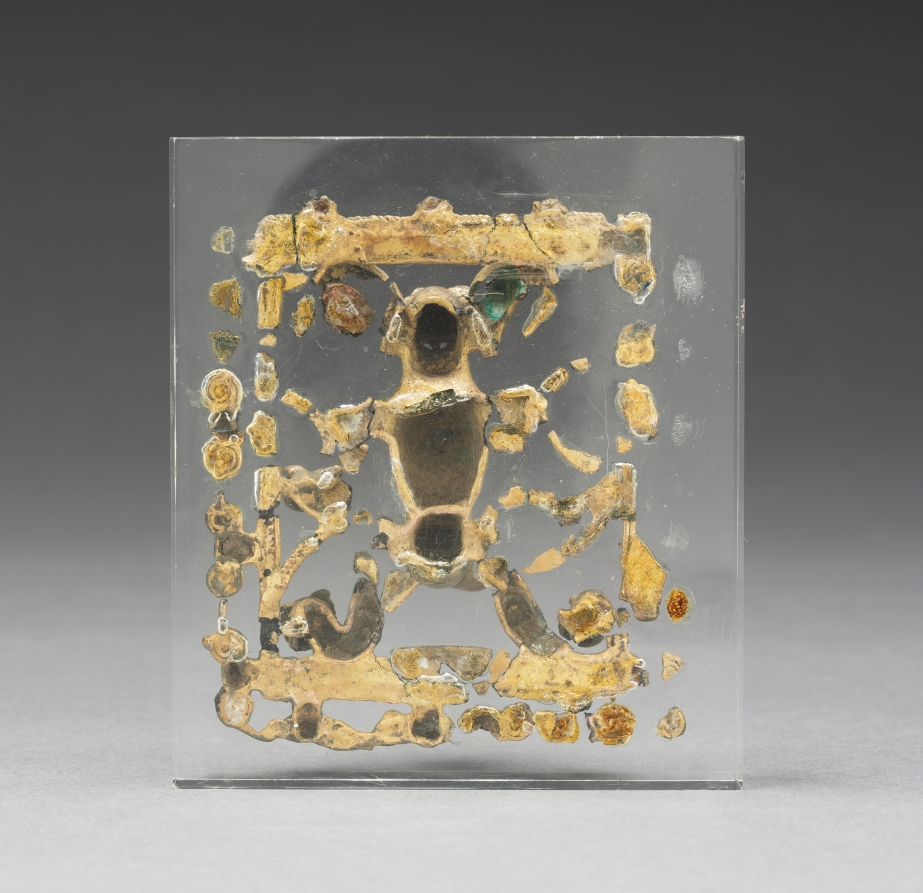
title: Jaguar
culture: Unassigned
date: 700–1550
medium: gold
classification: Metalwork